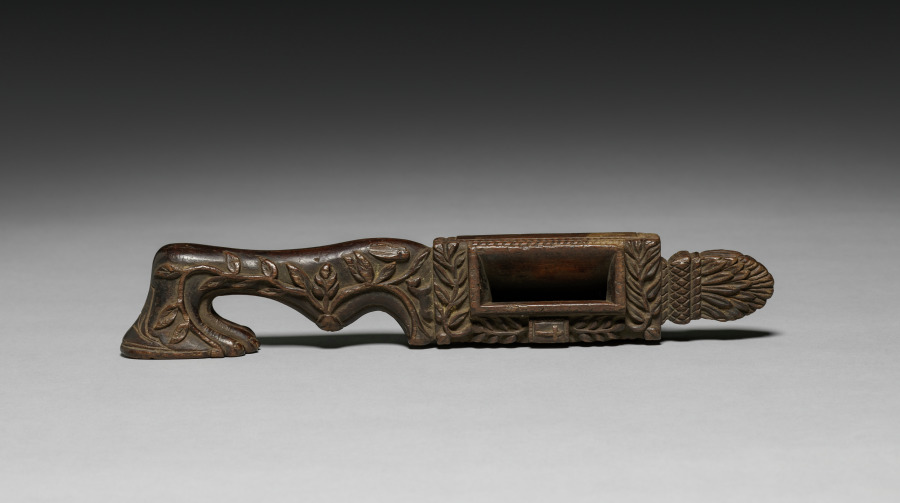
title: Scraper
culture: France or Italy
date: 1600s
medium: wood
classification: Tool